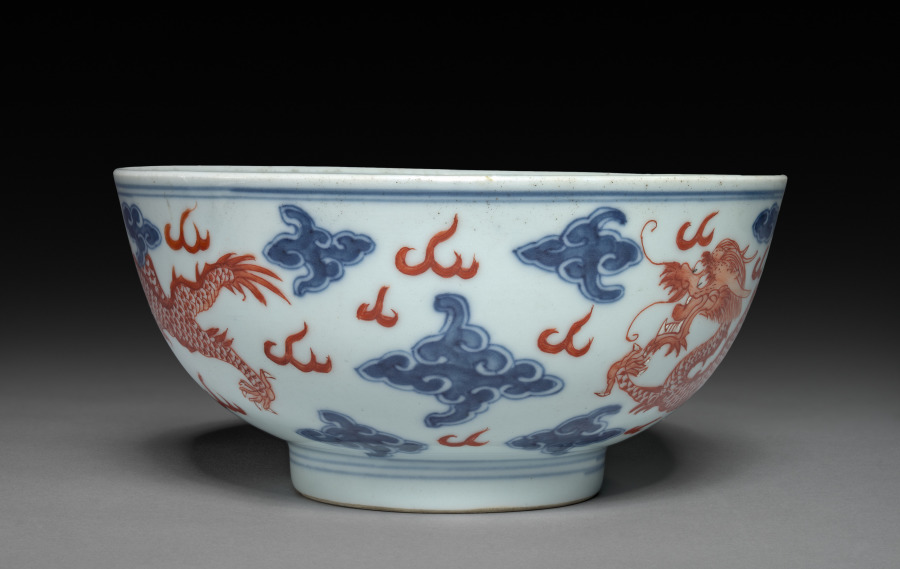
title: Bowl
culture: China, Qing dynasty (1644-1911), Qianlong mark and reign (1736-95)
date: 1736–95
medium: porcelain with overglaze red and underglaze blue enamel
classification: Ceramic